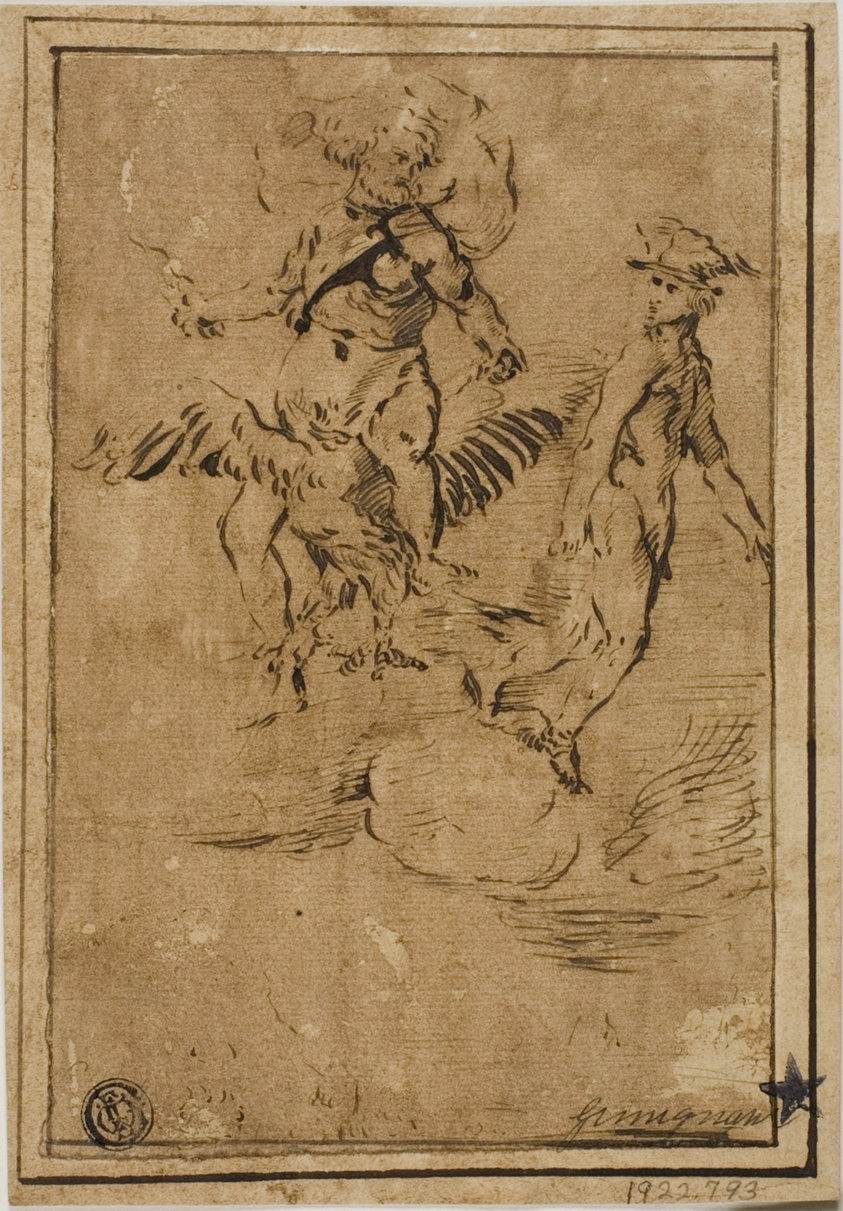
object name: Drawing and Watercolor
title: Jupiter and Mercury in the Clouds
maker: Possibly Giacinto Gimignani (Italian, 1611-1681); or Unknown Artist (1700-1799)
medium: Pen and brown ink, with brush and brown wash, on cream laid paper, laid down on ivory laid paper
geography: Italy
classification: pen and ink drawings; drawings (visual works); prints and drawing